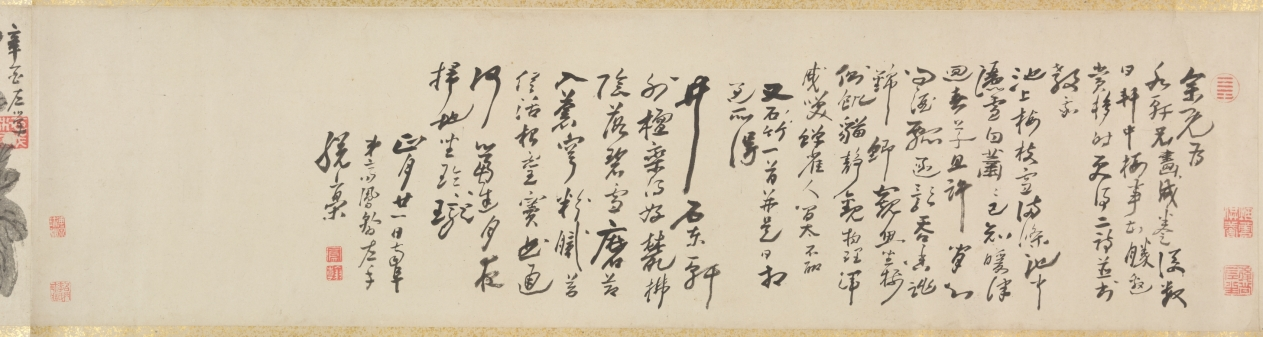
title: Plum Blossoms and Peonies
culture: China, Qing dynasty (1644-1911)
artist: Gao Fenghan (Chinese, 1683–1749)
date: 1741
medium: handscroll, ink on paper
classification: Painting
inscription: Artist's 2 inscriptions and 9 seals (the painting of Peonies with the artist's colophon and the colophon by Hou Chia-fan are on a single sheet of paper). Artist's inscription and 2 seals (Plum Blossoms): [seal] Ts'ai-yün. After finishing writing my colophon, I unrolled the painting to take another look, and it now seems that the composition here should have moved to the later part of the scroll. If that is the case, then the "Cool Beauty" [prunus] of the Solitary Hill is after all unable to take precedence over the "King of Flowers" [peony]. A laugh. Lao-fou inscribed. [seal] Feng-han. Artist's colophon (Plum Blossoms): [3 seals] Tun; Yen-yün-kung-yang, Hou-shang-tso-sheng. A few days after I painted this scroll for Shui- hsien [Yüeh Meng-yüan], the plum blossoms were in full bloom at his residence. He invited me over to enjoy them together for a long while, and I composed two additional poems and wrote them down here for his criticism. [Poems on the colophon are not translated.] First month, twenty-first day, your junior, Kao Feng-han of Nan-fou drafted this with the left hand. [seal] Feng-han. Artist's inscription and 4 seals (Peonies): Brushed with the left hand in the hsin-yu year [1741]. [seal] Yu-hsi. [3 seals at end of painting] Hou-shang-tso-sheng; Yen-yün-kung-yang; Shih-tsao-wu. Artist's colophon and seal (Peonies): The imperial concubine from the Yang family loved to dress in red, And from the emperor won the title of Hai-t'ang. But ever since she became the new dream of the moon palace, She changed into rainbow colors, while learning to dance. After I wrote the poem on Looking for Plum Blossoms in the Teng-wei Mountains, I attached to it a few branches of prunus, some bamboo tips and a piece of rock, with a scattering of green [moss] here and there to fill up the scroll. Unexpectedly, my playful fascination [with these subjects] was still not quite satisfied, so I made up these amorous ideas and romantic images [of the peony], to follow the footsteps of the fair lady of the Ku-hsieh Mountain [prunus]. Furthermore, I picked out one poem to be my vanguard. Perhaps such luminosity of wealth and power will be enough to overwhelm the poor fellows, and [they] will not mind the comparatively short length [of paper] assigned to it. Amusingly inscribed. Please correct me again. To Shui-hsien, my learned senior, your junior Han inscribed again. [seal] Tso-hua [left-handed painting]. 1 additional colophon and 5 additional seals: 1 colophon, dated 1742, and 3 seals of Hou Chia-fan (act. ca. 1742); 1 seal of P'u Ch'üan (20th c.?); 1 seal of Li family (dates unknown).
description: One of the so-called Yangzhou Eccentrics (a group of painters who lived in Yangzhou and were known for their unorthodox art and lifestyle), Gao Fenghan depicts China’s two most loved flowers in full bloom—the “cold beauty,” or plum blossom, in the first section, and the “king of flowers,” or peony, in the second section. Painted in 1741, the year when Gao decided to leave the south and return home to Shandong province in eastern China, this work was likely a token of farewell. His casual brushwork may indicate his mental and physical struggle at the time. After having crippled his right hand in 1737, Gao used his left hand to paint and achieved a crudeness and eccentric style unattainable before.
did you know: In East Asian art, peonies traditionally symbolize prosperity and wealth.